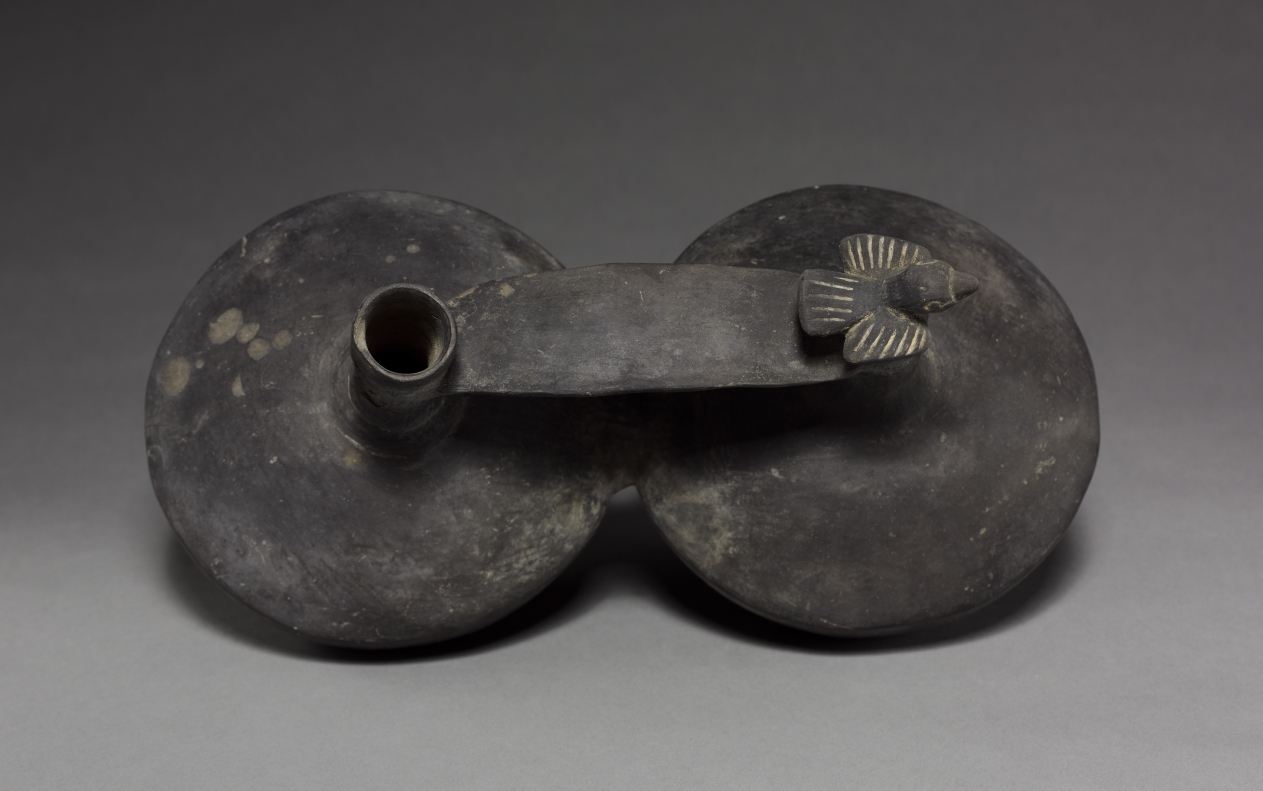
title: Bottle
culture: Peru, Chimú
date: 1300–1400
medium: pottery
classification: Ceramic